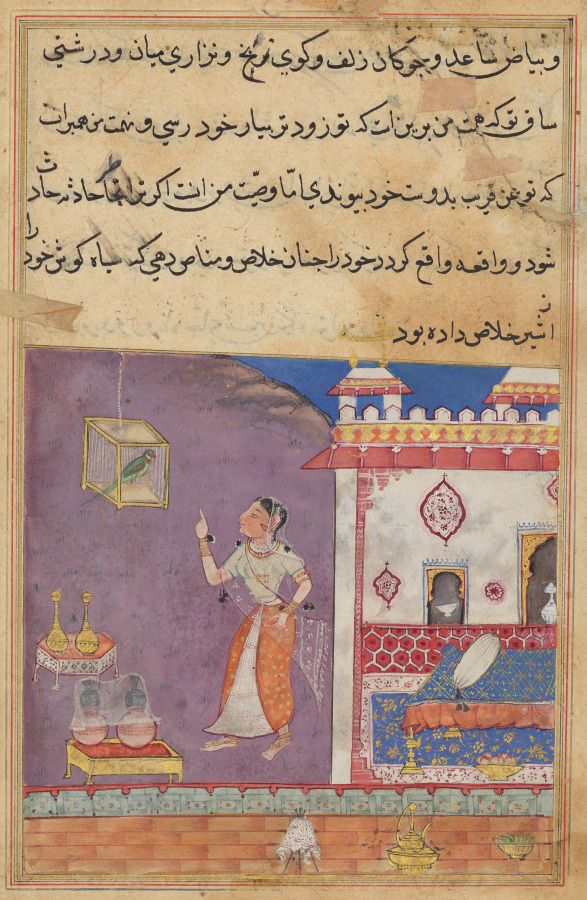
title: The Parrot Addresses Khujasta at the Beginning of the Twenty-ninth Night, from a Tuti-nama (Tales of a Parrot)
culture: Mughal India, court of Akbar (reigned 1556–1605)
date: c. 1560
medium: gum tempera, ink, and gold on paper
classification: Painting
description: Khujasta consults with the talking parrot Tuti before leaving to meet with her lover. The shrewd bird begins to tell her the story of a lynx who successfully saved himself from a lion. By the time the story ends, it is too late for Khujasta to leave for her rendezvous.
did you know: Two pieces of blue and white Chinese porcelain are visible in niches in Khujasta’s room.